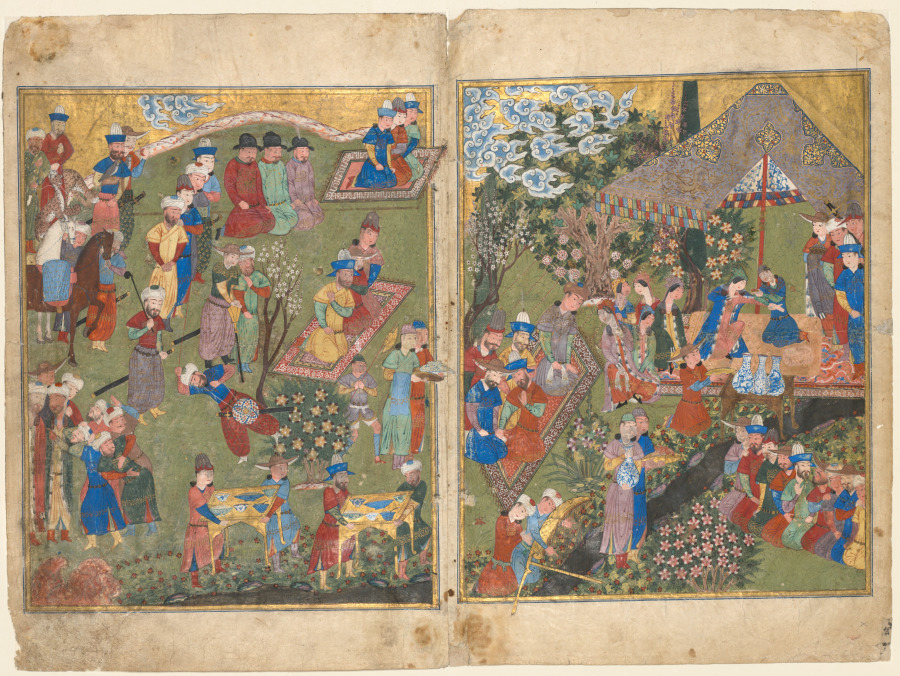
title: Royal Reception in a Landscape, left folio from the double frontispiece of a Shahnama (Book of Kings) of Firdausi (Persian, about 940–1019 or 1025)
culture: Iran, Shiraz, Timurid period (1370-1501)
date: 1444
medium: Opaque watercolor, ink, gold, and silver on paper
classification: Manuscript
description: The royal feast is set in a green landscape dotted with flowers and blossoming bushes against a gold sky with wisps of blue and white clouds. The group of figures in the upper left includes a falconer, horses, attendants, and two hunting cheetahs, while servers transport food and drink in gold and ceramic vessels, some presumably Chinese blue and white porcelain. Possibly this banquet was offered after a courtly hunt, a prestigious symbol of power and wealth. Among the groups of men sitting on elaborate carpets are three Chinese officials, identifiable by their black hats, kneeling together on the ground. Although their presence indicates the presence of foreign cultures within the Timurid court, the painting also reveals that not all are welcome to the feast; in the bottom half of the page a guard wields a stick to drive a group of men out of the garden.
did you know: The painting on this folio is the first half of a double-page frontispiece now detached from a Shahnama (Book of Kings) manuscript. CMA 1956.10 is the left half of the frontispiece.